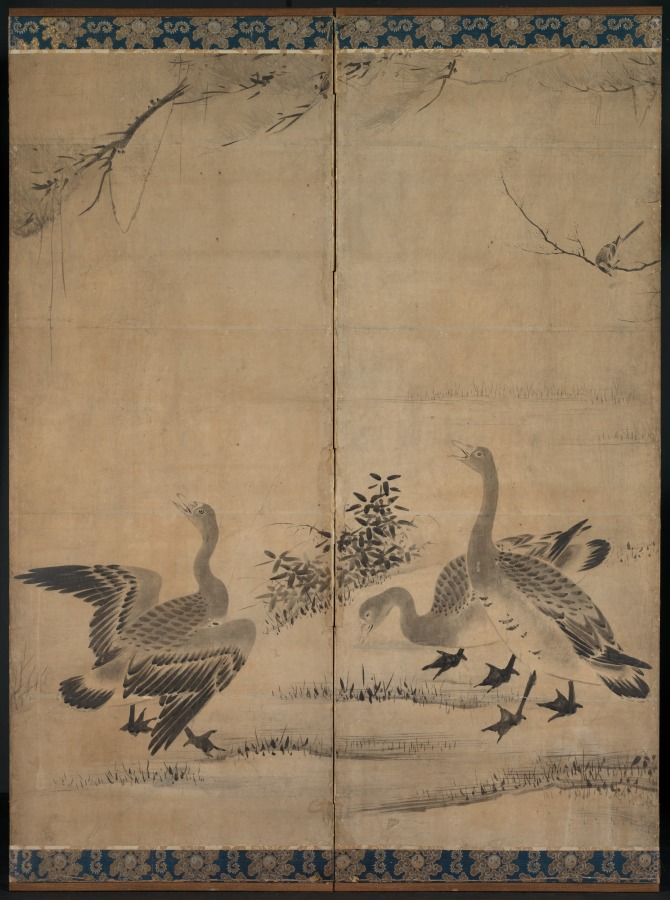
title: Wild Geese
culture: Japan, Edo period (1615–1868)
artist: Kano Sanraku (Japanese, 1559–1635)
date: late 1500s-early 1600s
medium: pair of six-fold screens; ink on paper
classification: Painting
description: Depictions of geese usually appear as ink paintings in Japan during the 1200s. They later show up in the colorful landscapes of illustrated handscrolls. Such early ink renditions of the birds have long been associated with classical Chinese Zen painting and poetry, which was avidly admired and collected in medieval Japan. In the screens on display, the artist portrayed the waterfowl in a pastoral setting without reference to classical or religious themes. Such ordinary subjects were imbued with special meaning in 14th- and 15th-century Japan through associations with continental culture, Zen thought and poetry, and famous Chinese monk-painters whose painting techniques had become revered as visual emblems of Zen principles. The screens here reflect the continuation of that painting tradition in the late 1500s or early 1600s by the head of the most important studio in Kyoto. Sanraku also executed a number of colorful folding screen compositions, but here pays homage to the style of early Zen painting.